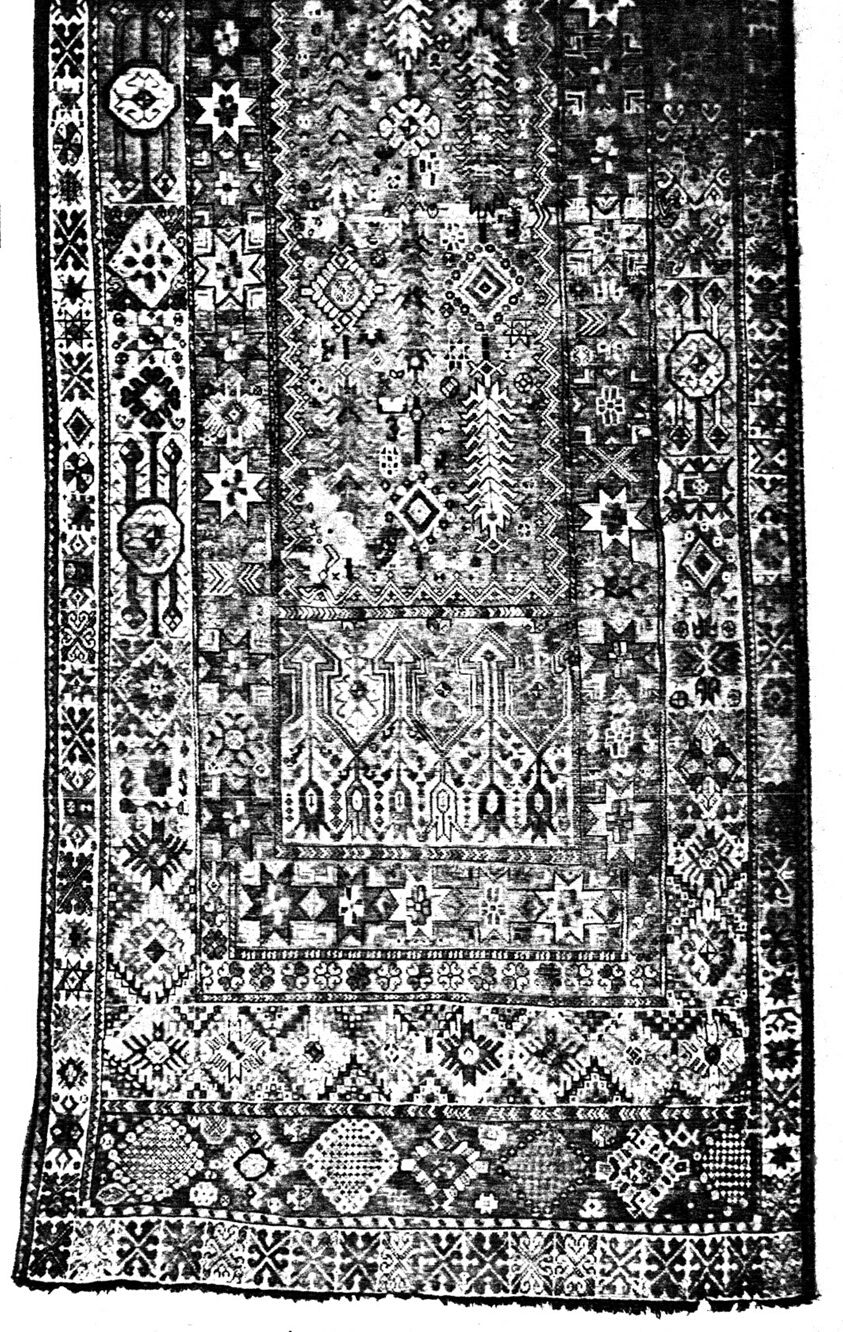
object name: Textile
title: Carpet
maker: Morocco, Rabat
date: 1850/1900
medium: Wool, plain weave with supplementary wrapping wefts forming cut pile through a technique known as "Turkish" (Ghiordes) knots"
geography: Morocco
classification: textile; weaving - rug; weaving